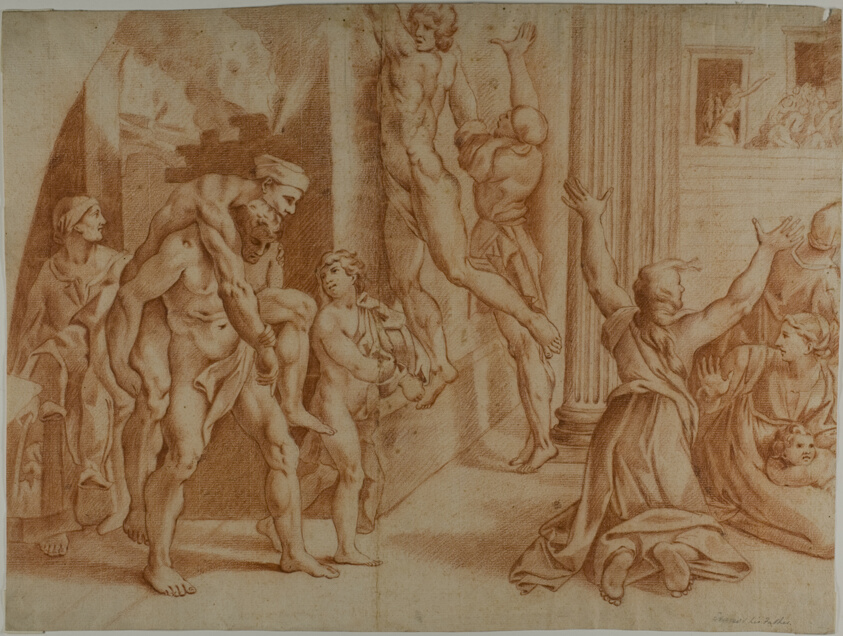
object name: Drawing and Watercolor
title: Fire in the Borgo (recto); Slight Sketch of the Fire in the Borgo (verso)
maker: Ottaviano Dandini (Italian, c. 1706-1750); after Raffaello Sanzio, called Raphael (Italian, 1483-1520)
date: 1726/1750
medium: Red chalk (recto and verso) on ivory laid paper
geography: Italy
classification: chalk; drawings (visual works); prints and drawing